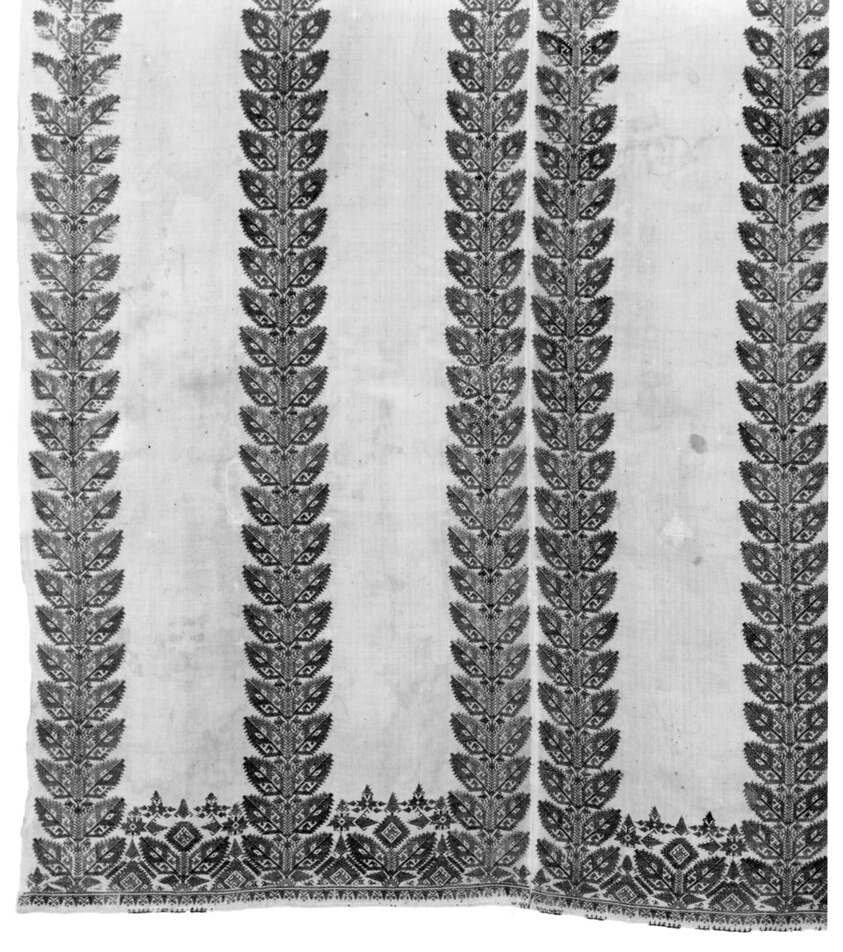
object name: Textile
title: Curtain (For a Bed)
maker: Greece, Dodecanese Islands, Patmos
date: 17th century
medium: Linen, plain weave; embroidered with silk in running stitches (pattern darning); four loom widths joined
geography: Patmos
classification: textile; needlework (visual works)